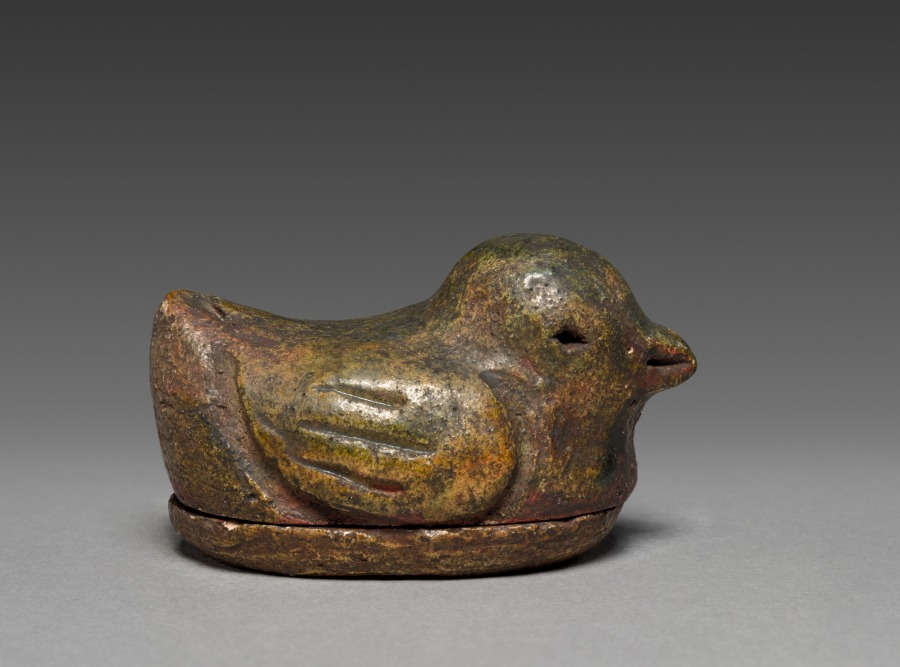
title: Incense Container (Kōgō) in the Shape of a Bird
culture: Japan, Edo period (1615–1868)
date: c. 1700–1868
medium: Stoneware with glaze and carved decoration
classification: Ceramic